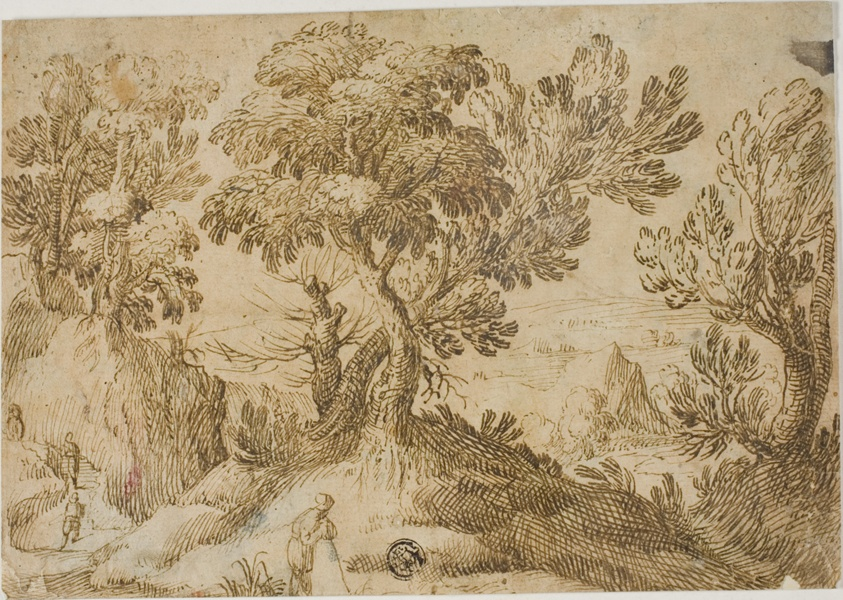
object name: Drawing and Watercolor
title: Figures in Hilly Landscape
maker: Style of Giovanni Francesco Grimaldi (Italian, 1606-1680); or follower of Paul Bril (Flemish, 1554-1626); or after Remigio Cantagallina (Italian, 1582-1656)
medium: Pen and brown ink on tan laid paper, laid down on ivory wove paper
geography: Italy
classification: pen and ink drawings; drawings (visual works); prints and drawing